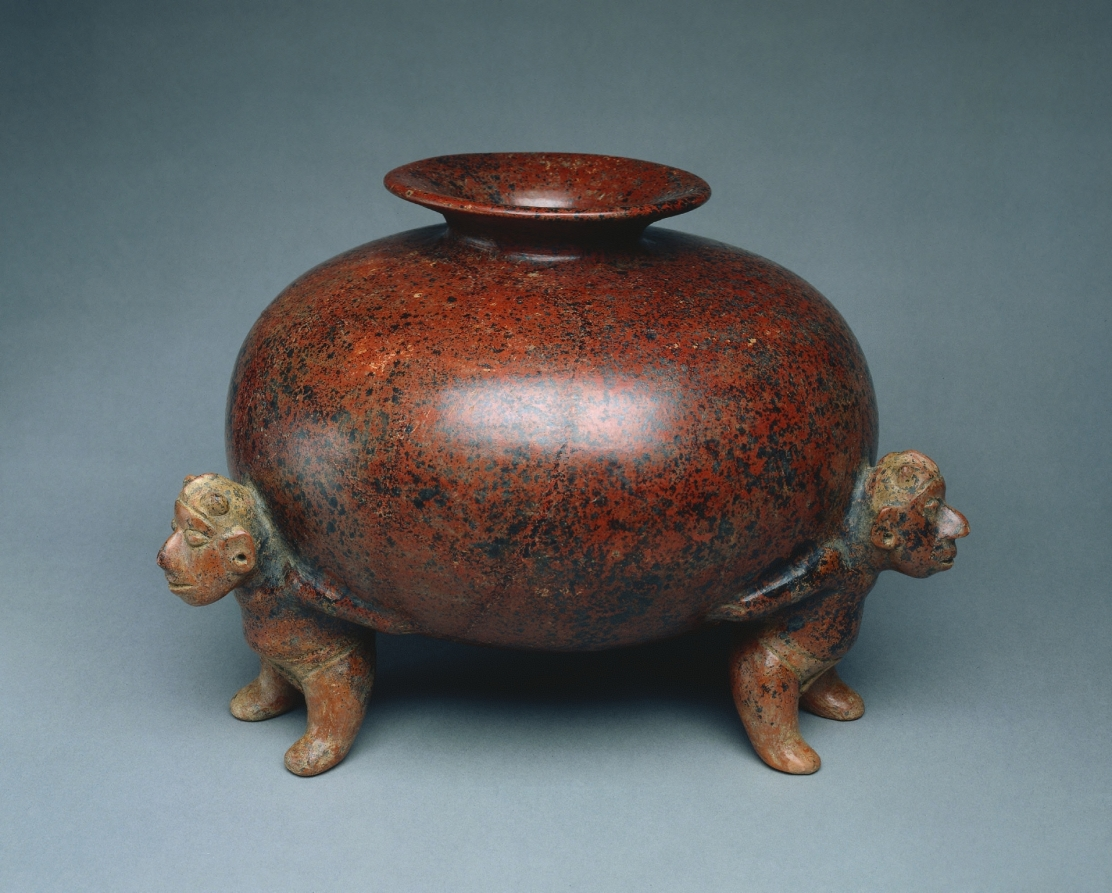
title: Vessel with Crested Atlantean (Supporting) FIgures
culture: West Mexico, Colima, Comala style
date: 200 BCE–300 CE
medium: earthenware with colored slip, black burial deposits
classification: Ceramic